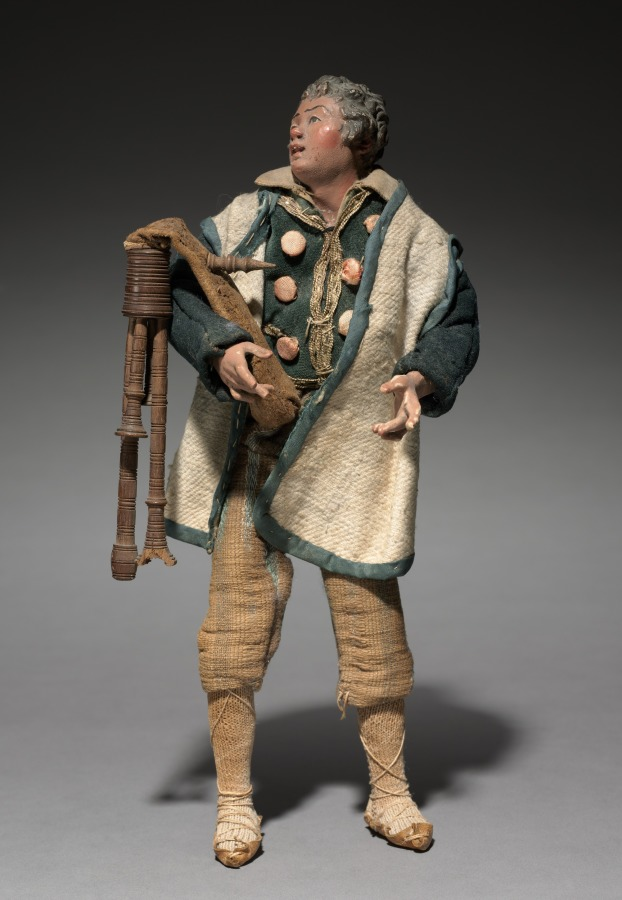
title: Figure from a Crèche: Piper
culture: Italy, Naples, late 18th-early 19th century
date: 1780–1830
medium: painted wood and terracotta with various textiles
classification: Sculpture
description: The practice of creating scenes of the Nativity for the home dates from the early 1700s in Italy, where people began to set up doll-like figures of about a foot or less in height. The custom was particularly popular in Naples around 1800, where crèche scenes (crèche means cradle, or crib) included many figures, whose heads and hands of painted terracotta, stuffed cloth bodies, and clothing adapted from contemporary local costumes gave them an amazingly realistic character. Representations of the birth of Jesus can be traced to the first few centuries of Christianity. Both living creatures and sculptural depictions of them were used from early times. By the late middle ages it was customary to create life-size figures of wood or stone, naturalistically painted, to represent the characters who participated in the events of Jesus's early life. These sculptures were then arranged in scenes illustrating one or both of the most important of these events, the Adoration of the Shepherds and the Adoration of the Magi-the three kings from the East who came to pay homage to the Christ child. Used in churches, these large figures were especially popular in Italy, Central Europe, Spain, and Portugal.